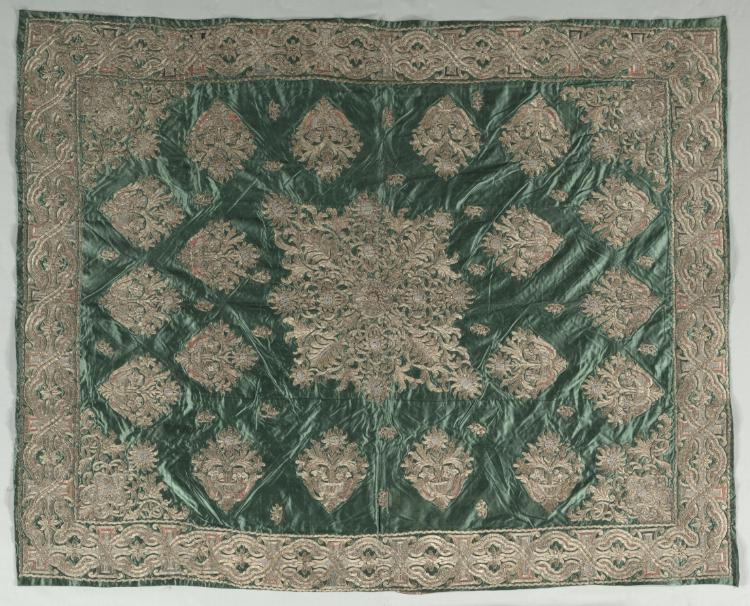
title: Gold-Thread Embroidered Cover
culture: Turkey, Ottoman period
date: 1800s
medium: silk, gilt-metal, silver-metal, paper, cotton padding; satin weave, embroidery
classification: Embroidery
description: Silk fabrics embroidered with gold thread appear to have ranked second only to gemstone-embellished textiles. Both were more prestigious than brocaded silks, which are more numerous. Embroidery was an essential component of daily life because it served innumerable covering functions. In this vibrant example with European influence, blossoming plants and foliate motifs embellish the field and border. Gold, silver, and silk thread cover paper templates which are secured with thread raised from underneath, called couching. The padded blossoms are covered with several types of silver thread for dazzling effects in a style popular during the 18th and 19th centuries at the imperial Topkapi Palace in Istanbul as well as provincial centers.